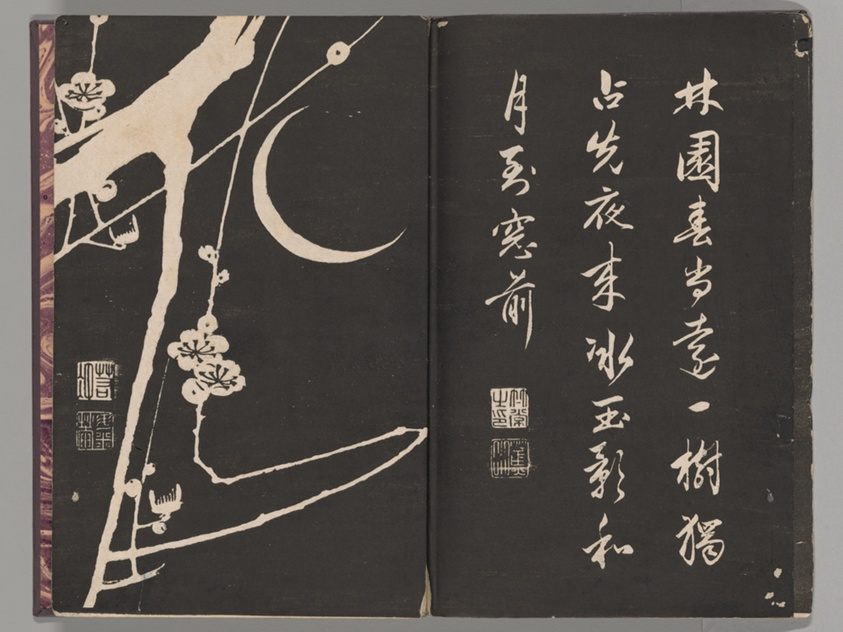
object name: Book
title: Soken sekisatsu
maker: Ito Jakuchu (Japanese, 1716-1800)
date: 1767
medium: Woodblock printed book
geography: Japan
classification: book